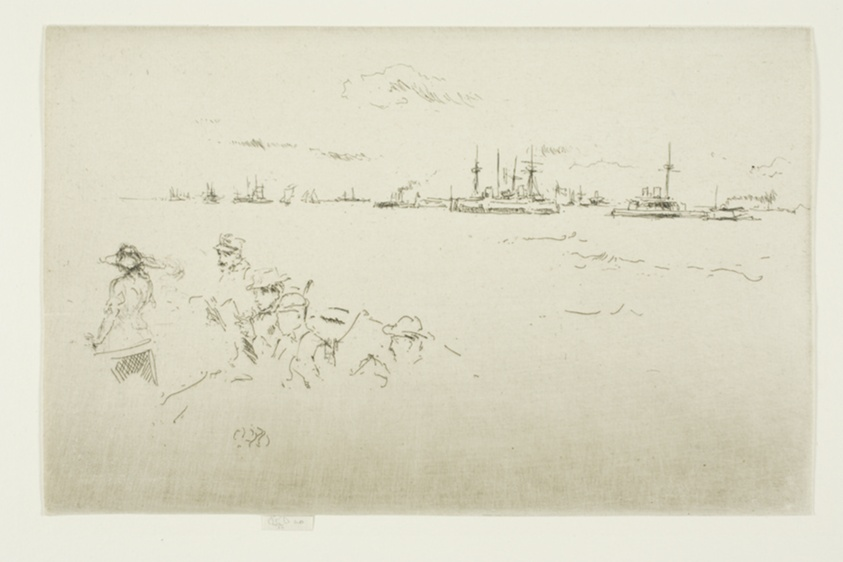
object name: Print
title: The Fleet: Monitors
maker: James McNeill Whistler (American, 1834-1903)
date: 1887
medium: Etching and drypoint with foul biting in black ink on cream laid paper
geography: United States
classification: etching; foul biting; print; prints and drawing; drypoint; paper